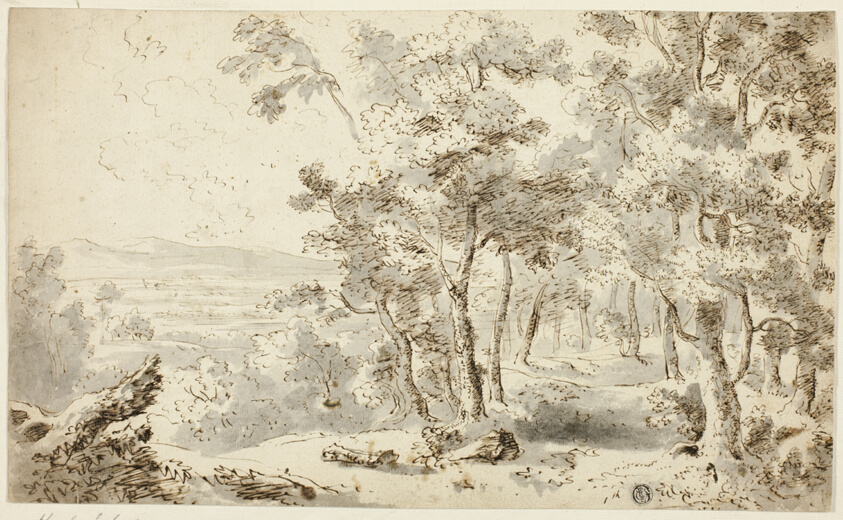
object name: Drawing and Watercolor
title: Forest, Valley and Distant Hills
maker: Karl Schutz (Austrian, 1745-1800)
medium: Pen and brown ink, with brush and gray wash, on cream laid paper, tipped onto ivory laid paper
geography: Austria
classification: pen and ink drawings; drawings (visual works); prints and drawing